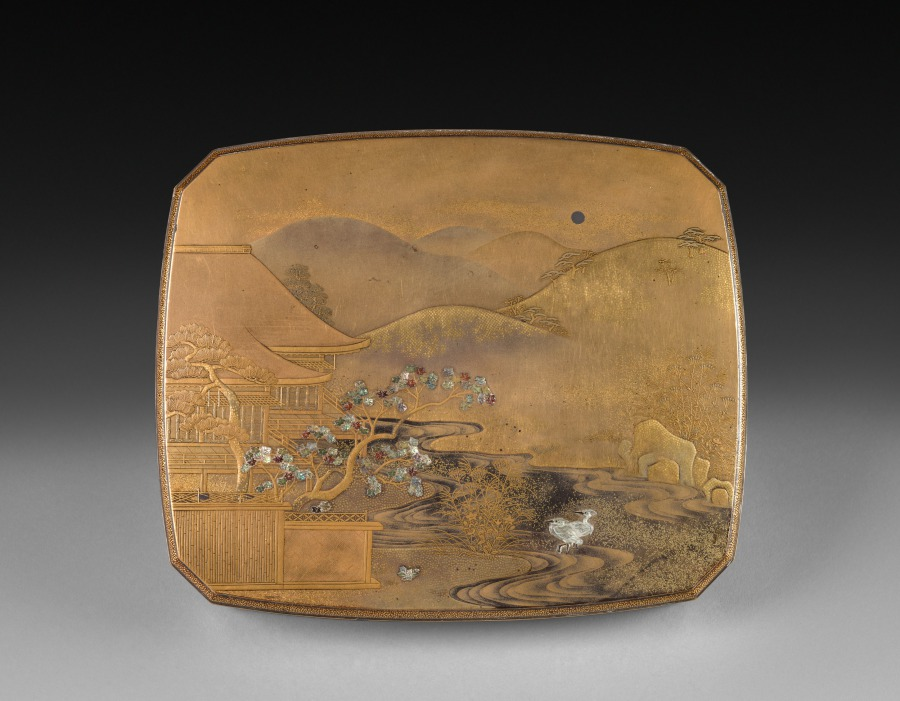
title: Box with Landscape (lid)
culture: Japan, Edo period (1615–1868) to Meiji period (1868–1912)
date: 1800s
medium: lacquer with sprinkled gold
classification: Lacquer